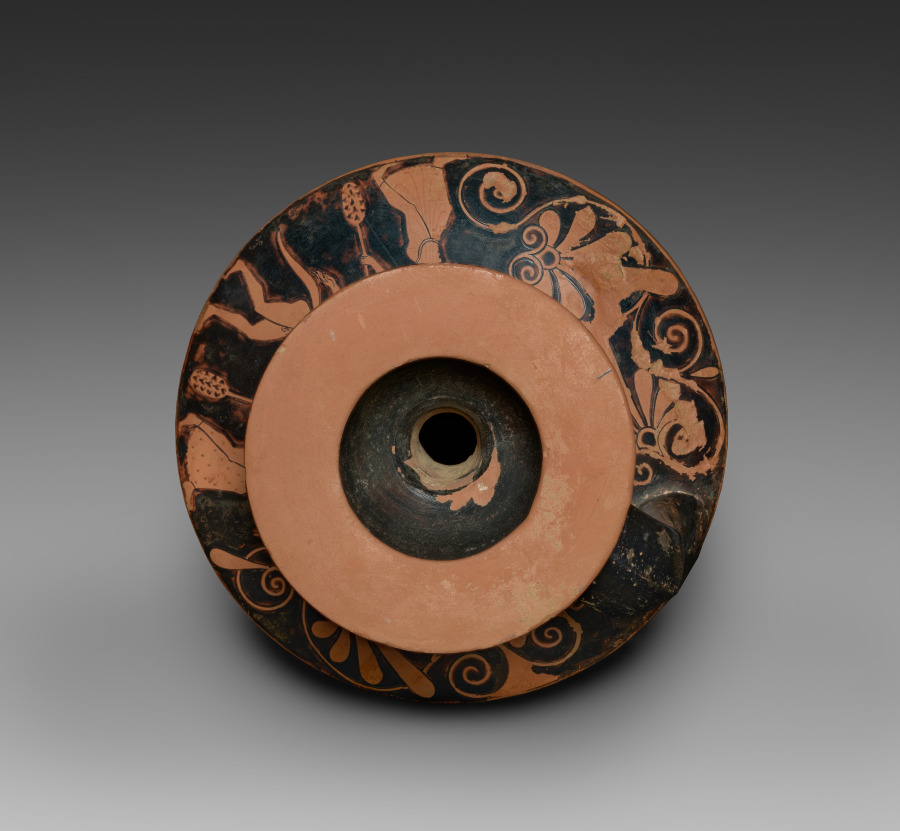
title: Red-Figure Lekythos (Oil Vessel): Athena Slaying Giant (body); Satyr between Maenads (shoulder)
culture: Greek, Attic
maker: attributed to Berlin Painter (Greek, Attic, active c. 505–460 BC)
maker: attributed to Painter of Goluchow 37 (Greek, Attic, active c. 490–460 BC)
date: c. 490 BCE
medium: ceramic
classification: Ceramic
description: The two separate areas of figural decoration on this vase have been attributed to different painters: the small satyr and maenads on the shoulder to the Berlin Painter; and the larger figures of Athena and the slain Giant Enkelados on the body to the Painter of Goluchow 37. Scholars have named these two painters, whose actual names remain unknown, after other vases they have painted, now in Berlin and Warsaw. The victory of Athena and the Olympian gods over the Giants has been interpreted as a metaphor for the Greek victory over the Persians around the time this vase was made. Thus, although Enkelados appears as a fully armed warrior, he falls in utter and complete defeat—bleeding from multiple wounds, eyes rolling back, sword dropping from his hand.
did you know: First attributed to Douris, this vase is now thought to have been painted by two anonymous painters.